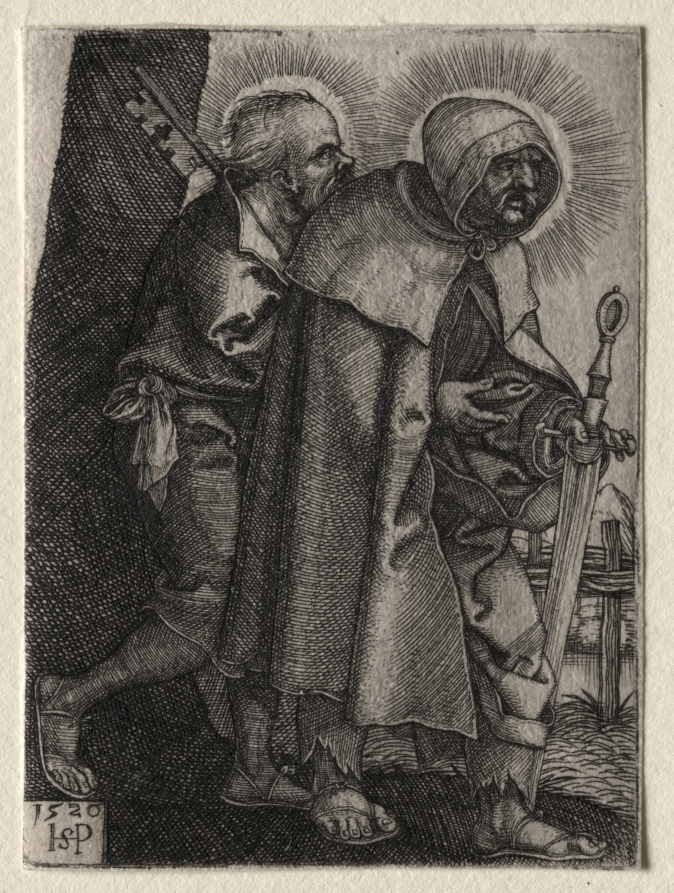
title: Christ and the Apostles: St. Peter and St. Paul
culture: Germany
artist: Hans Sebald Beham (German, 1500–1550)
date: 1520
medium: engraving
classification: Print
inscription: inscribed in plate: 1520/ [artist's monogram]